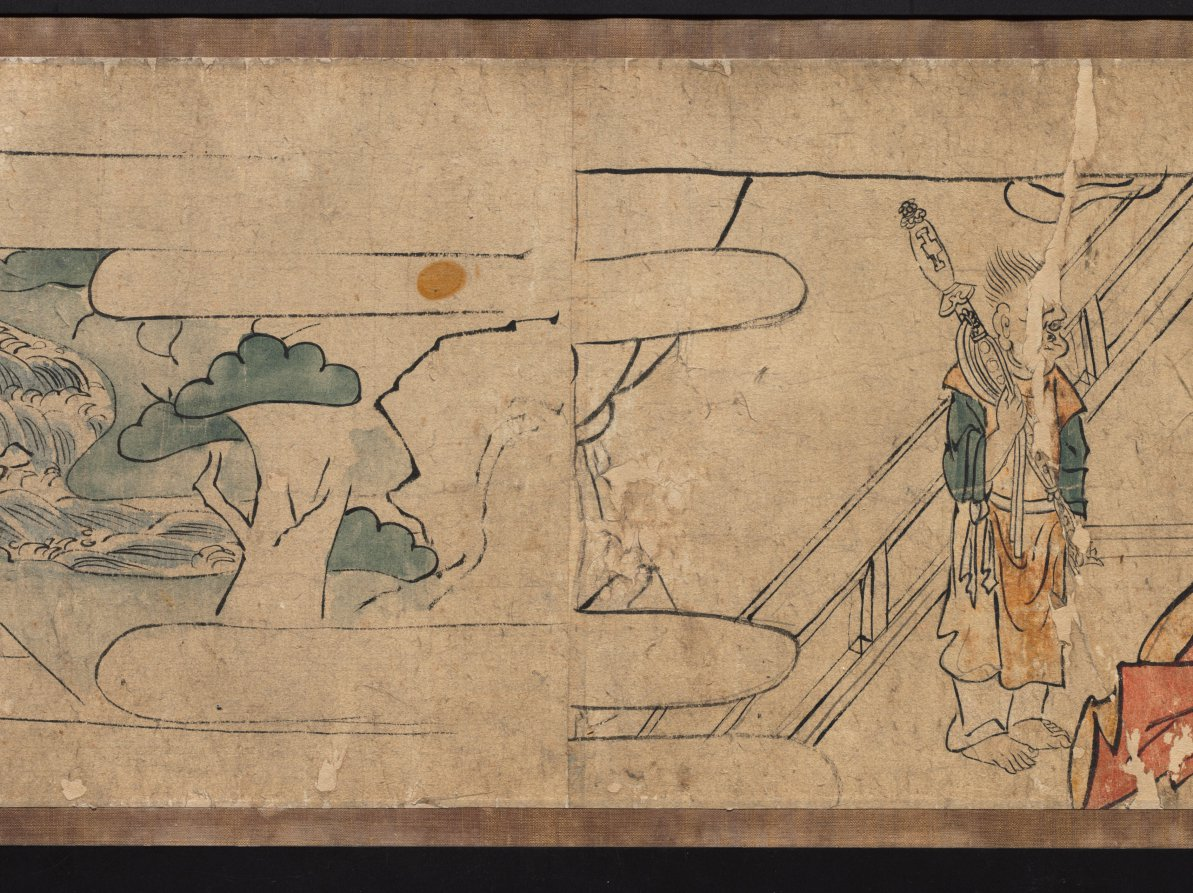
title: Oeyama Engi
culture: Japan, Edo period (1615–1868)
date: 1615–1868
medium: one of a pair of handscrolls; ink and color on paper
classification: Painting